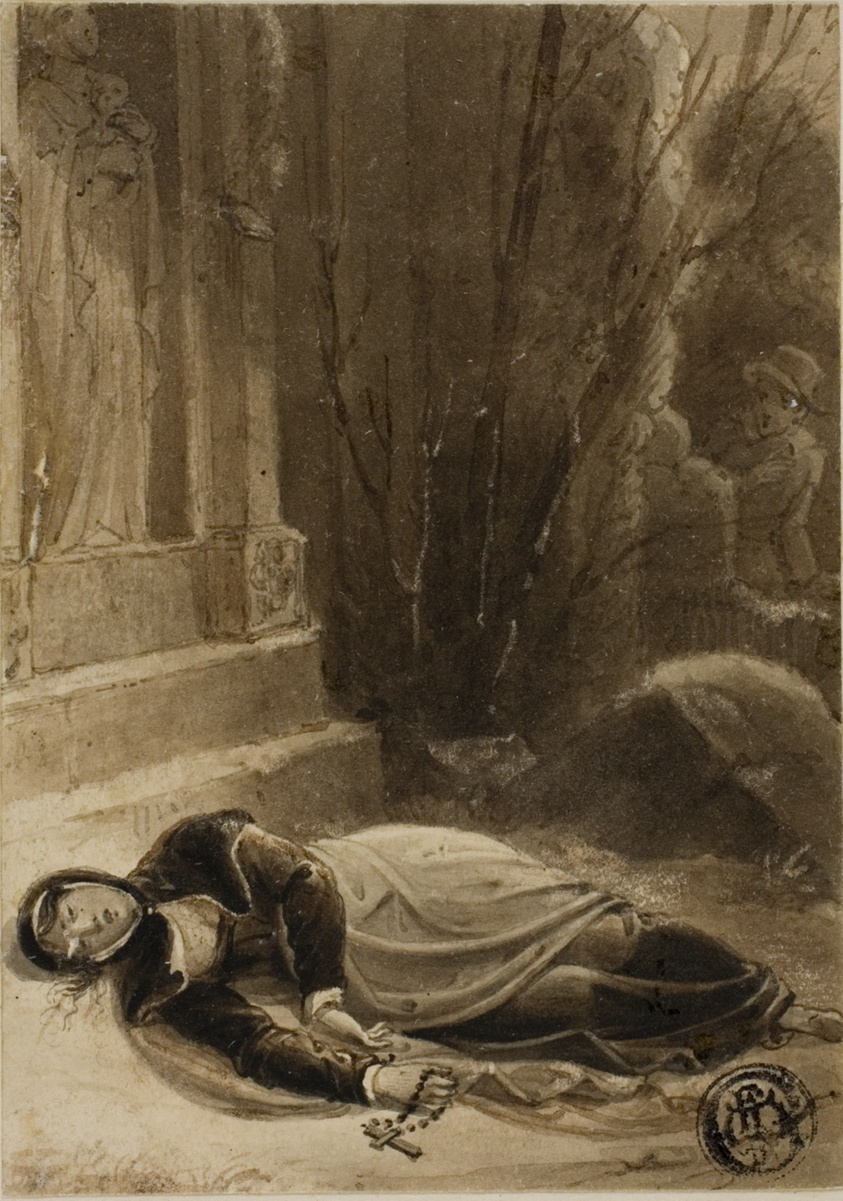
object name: Drawing and Watercolor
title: Lady of the Lake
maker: Richard Westall (English, 1765-1836)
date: 1785/1834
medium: Pen and brown ink with brush and gray and brown wash, heightened with touches of white gouache, on cream wove paper, laid down on board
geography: England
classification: ink or chalk wash; drawings (visual works); prints and drawing